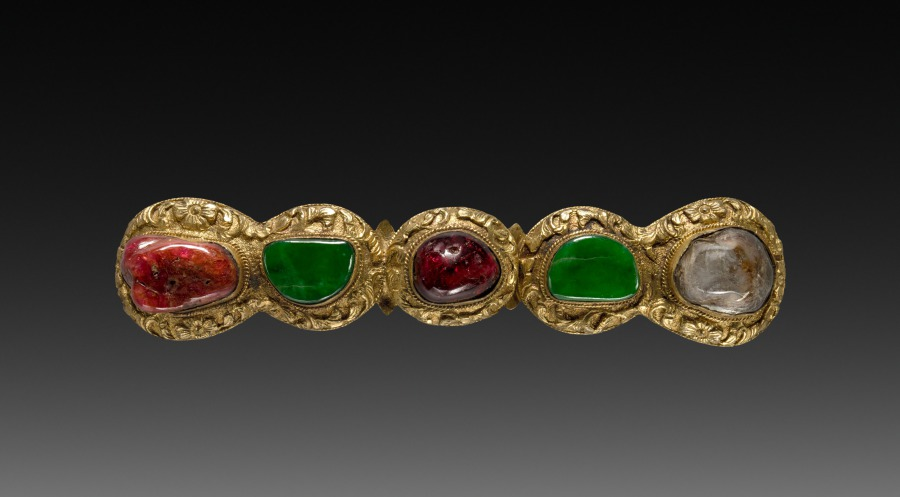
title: Buckle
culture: China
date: 1900s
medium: engraved brass, semi-precious stones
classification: Jewelry